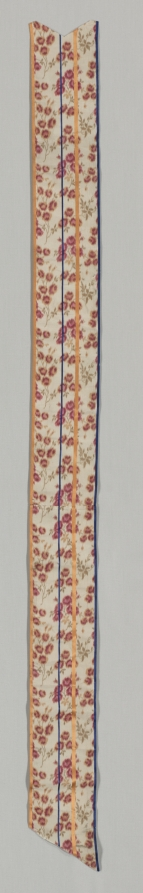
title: Ribbon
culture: France, late 19th century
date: c. 1870s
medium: silk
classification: Textile